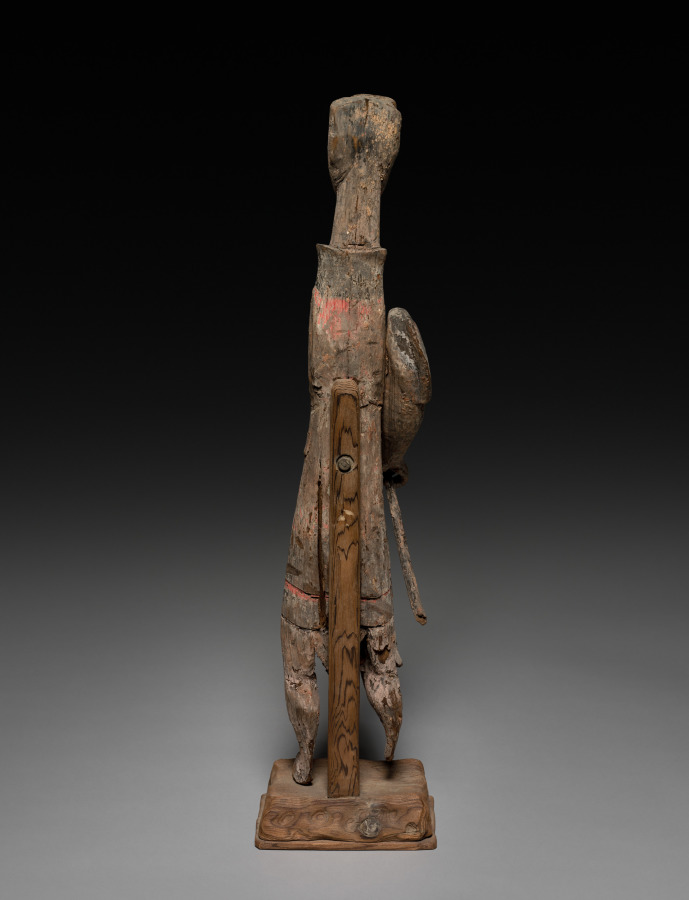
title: Figure with Sword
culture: China, Eastern Zhou dynasty (770–256 BCE), Warring States period (475–221 BCE)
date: 400–300 BCE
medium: wood with traces of polychromy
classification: Sculpture